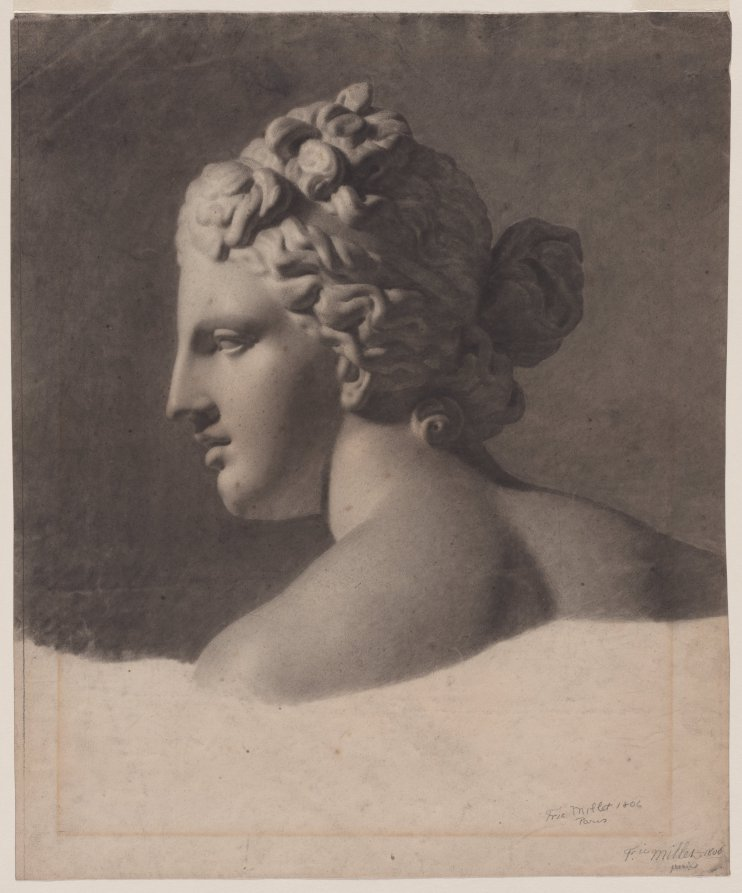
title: Study of a Plaster Cast (a la bosse)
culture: France, 19th century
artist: Frederic Millet (French, 1786–1859)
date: 1806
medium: black chalk with graphite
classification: Drawing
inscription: Signed and dated twice, lower right: Fric Millet 1806 / Paris